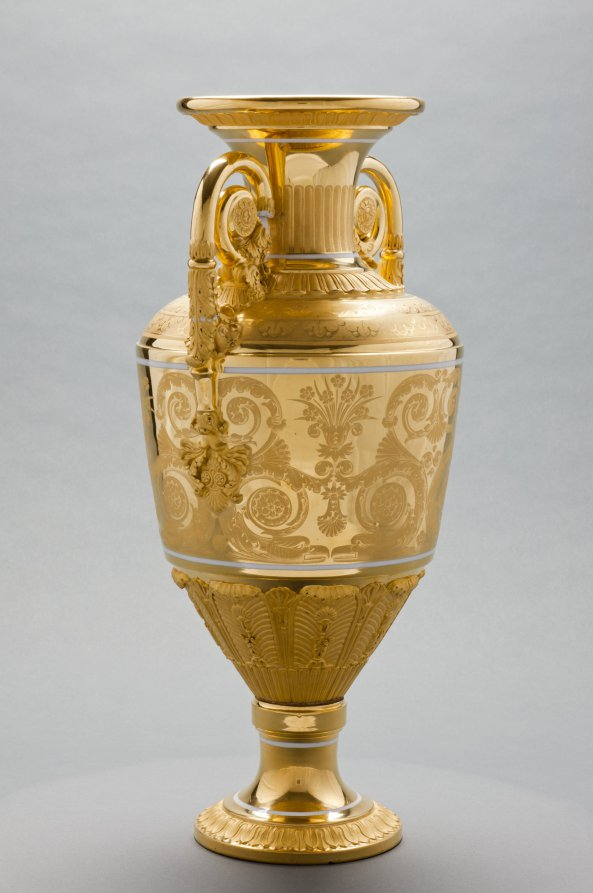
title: Vase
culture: Russia, St. Petersburg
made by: St. Petersburg Imperial Porcelain Factory (Russian)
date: c. 1820–1830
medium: gilt porcelain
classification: Ceramic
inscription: inscribed: "Moreau" in gold near lip.